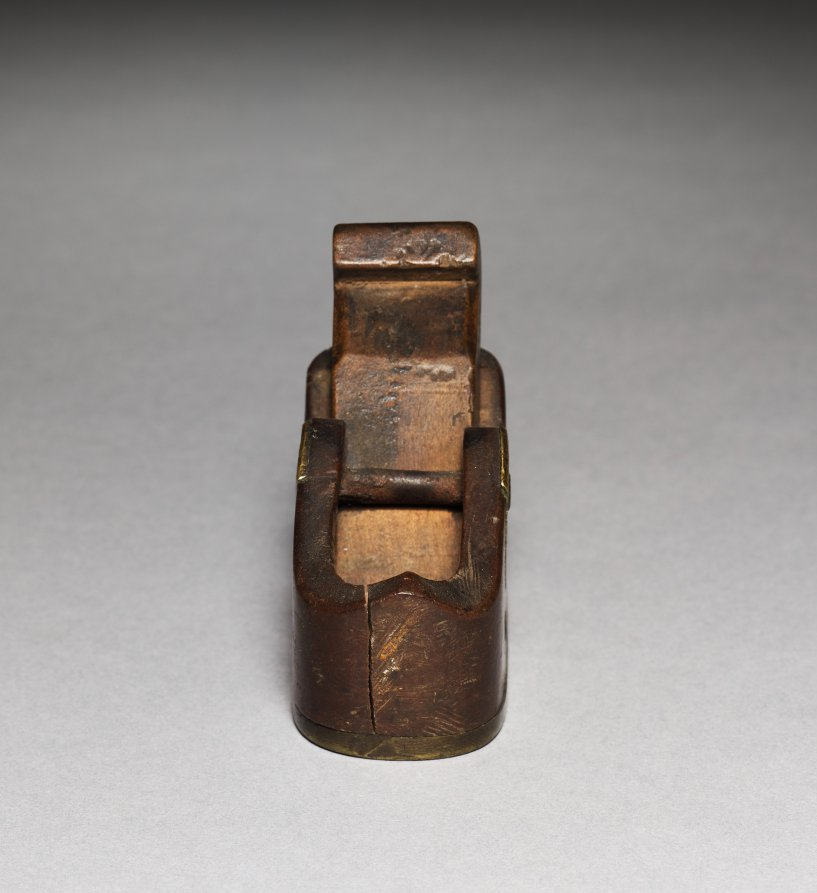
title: Plane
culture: Europe, 18th century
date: 1700s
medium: wood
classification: Tool